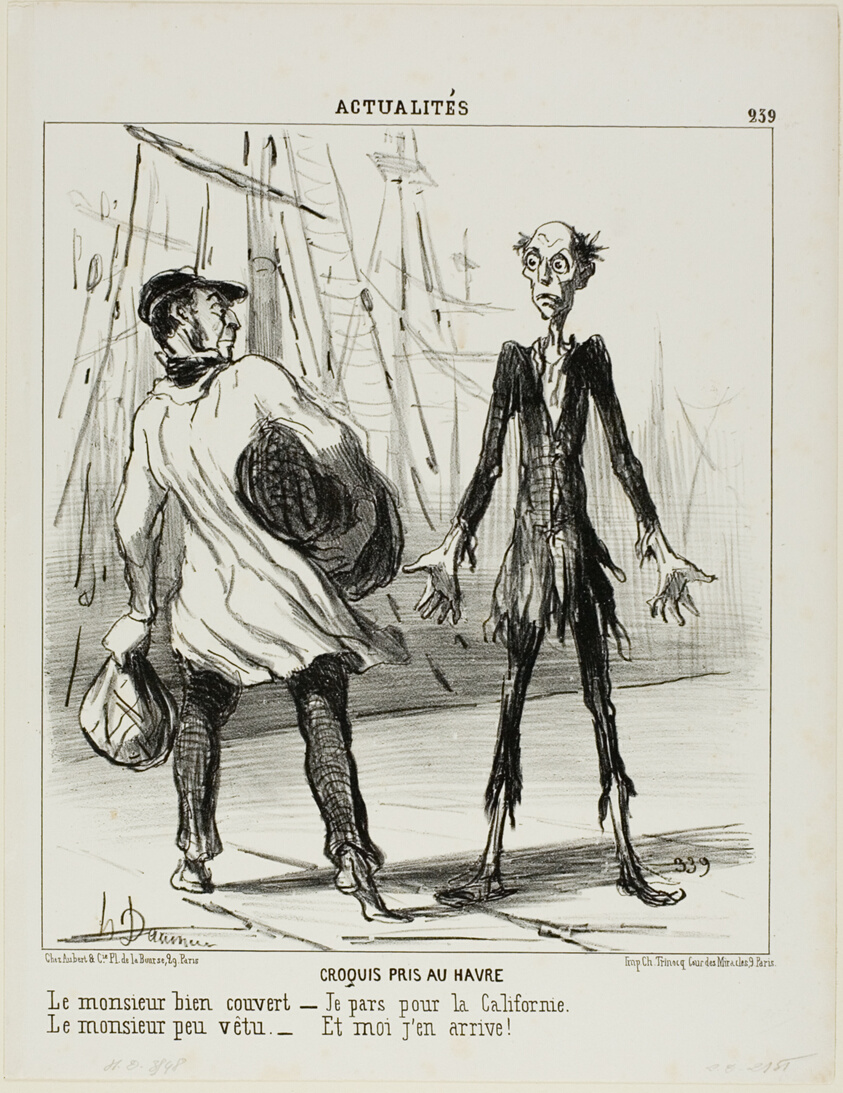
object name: Print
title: Sketches From Le Havre. The well dressed gentleman: “- I am leaving for California.” The poorly dressed gentleman: “- That's where I just came from,” plate 239 from Actualités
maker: Honoré Victorin Daumier; French, 1808-1879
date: 1851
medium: Lithograph in black on white wove paper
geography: France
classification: lithograph; print; prints and drawing